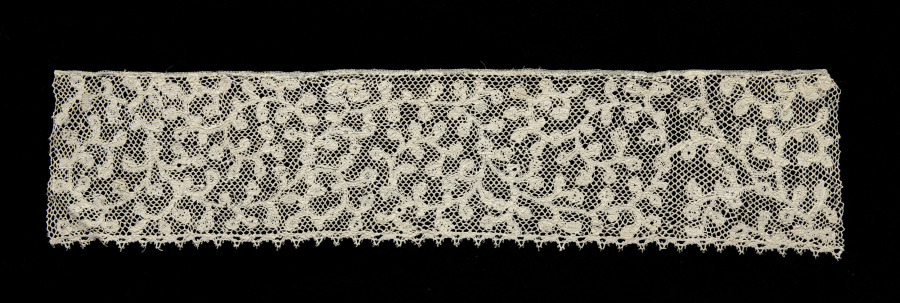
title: Lace Insertion and Edging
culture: Italy, Milan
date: 1600s–1700s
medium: Bobbin lace (Punto di Milano)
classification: Lace